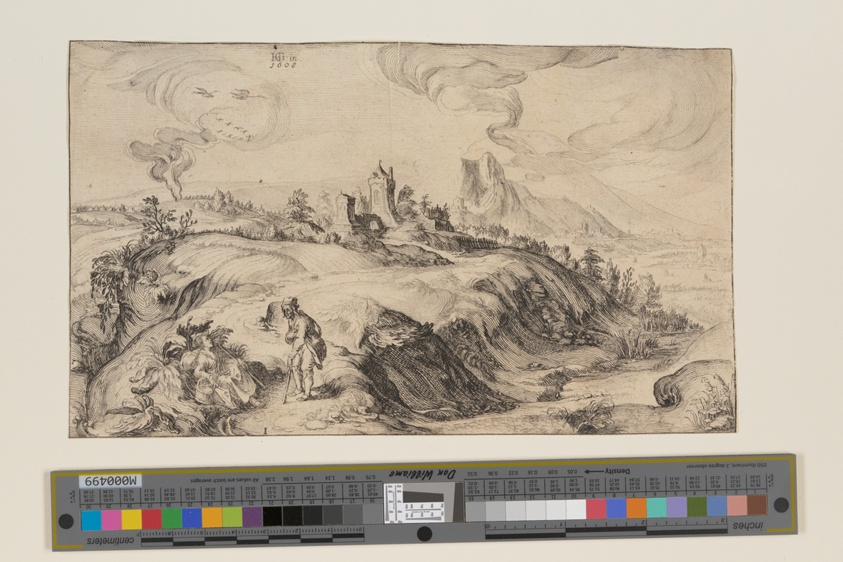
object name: Print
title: Mountainous Landscape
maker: Simon Frisius (Dutch, c. 1580–1629); Hendrick Goltzius (Dutch, 1558–1617)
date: 1608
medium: Etching on ivory laid paper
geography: Netherlands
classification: print; paper; prints and drawing; etching